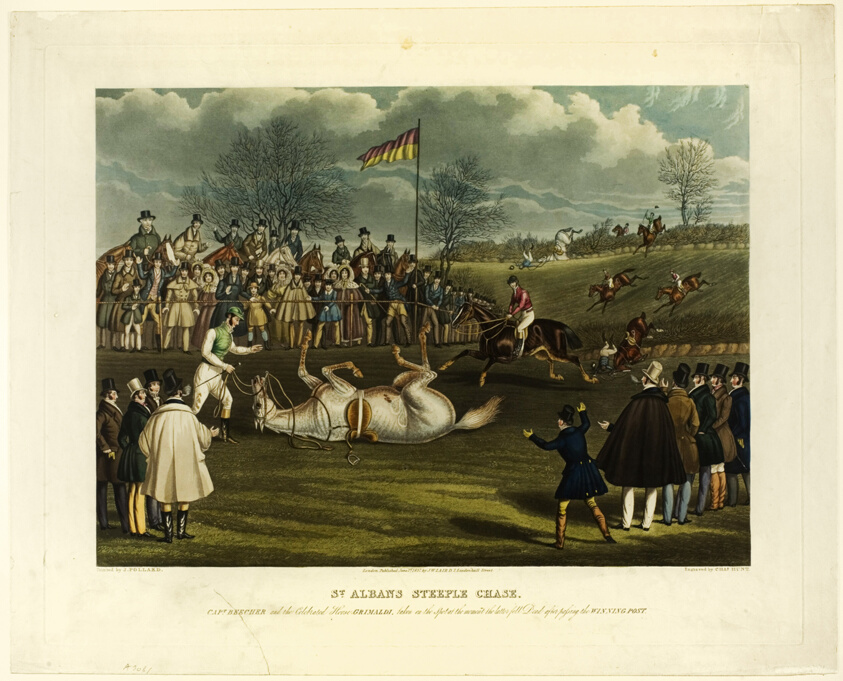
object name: Print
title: Saint Albans Steeplechase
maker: Charles Hunt (English, 1803-1877); after James Pollard (English, 1797-1867)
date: 1837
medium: Aquatint on paper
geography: England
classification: aquatint; print; prints and drawing